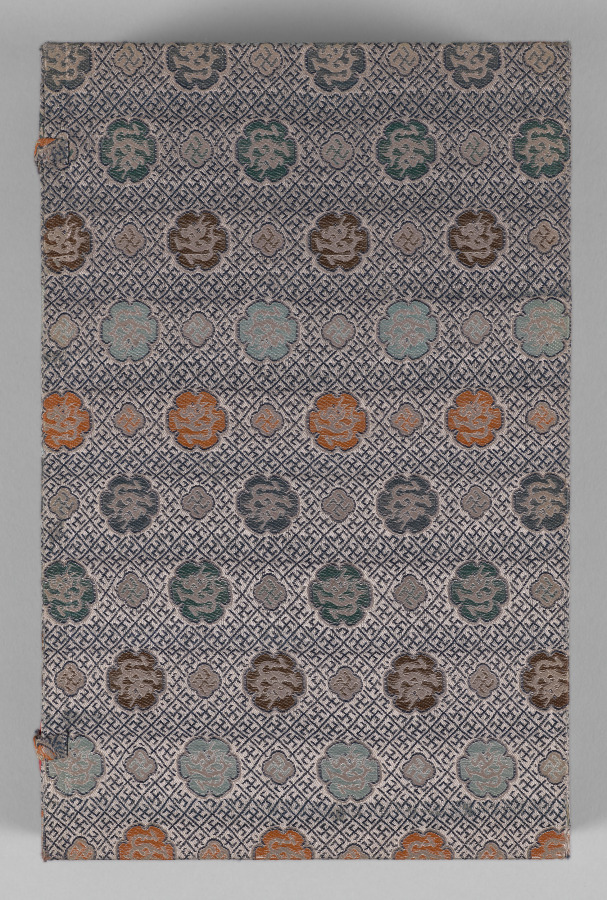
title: Yu-hai (Ocean of Jade) woodblock bound volume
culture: China, Ming dynasty (1368–1644)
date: 1368–1644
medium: woodblock-printed book with painted edges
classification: Bound Volume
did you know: When each book is rolled to form a cylinder, a landscape appears on the edges, painted in ink and washes of color.